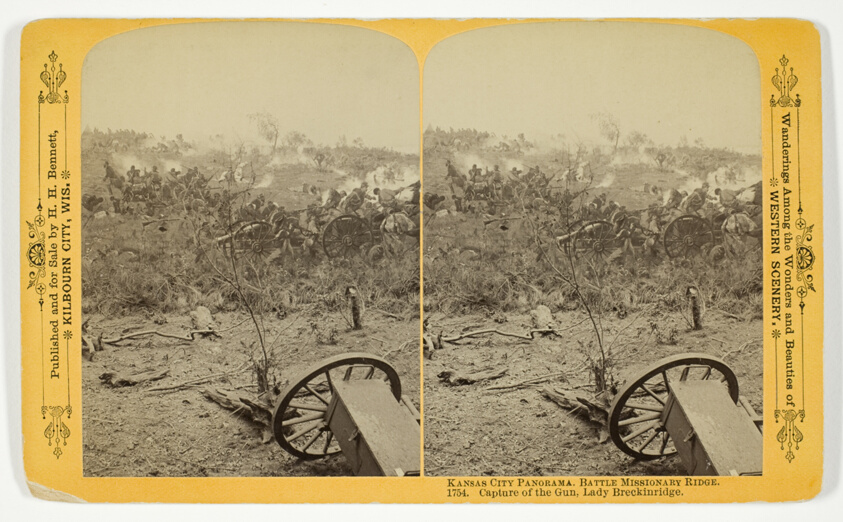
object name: Photograph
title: Capture of the Gun, Lady Breckinridge, No. 1754 from the series "Kansas City Panorama. Battle Missionary Ridge"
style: 19th century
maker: Henry Hamilton Bennett (American, born Canada, 1843-1908)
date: 1889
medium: Albumen print, stereo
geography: Wisconsin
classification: photography; photograph; albumen silver print; stereograph (albumen)